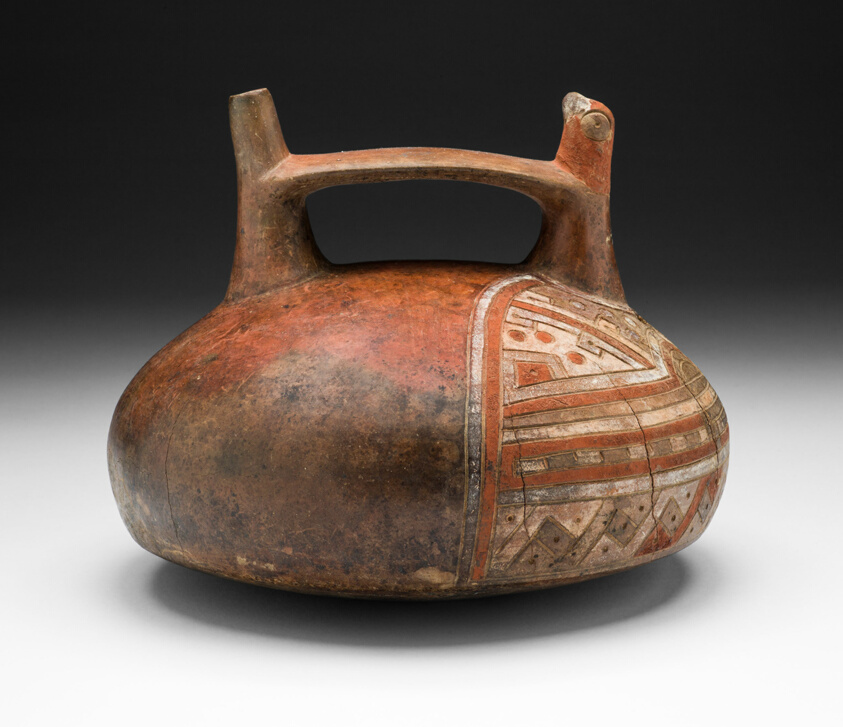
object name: Vessel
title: Vessel with Abstract Feline Mask and Bird-Head Spout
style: paracas, early horizon, Pre-Columbian, americas, andes, Arts of the Americas, andean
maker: Paracas (Ica Valley, south coast, Peru)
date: 650–150 BCE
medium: Ceramic with resinous postfire paint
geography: Ica Valley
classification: earthenware; art of the americas; ceramics; vessel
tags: feline, animals, birds, geometric, abstract motifs